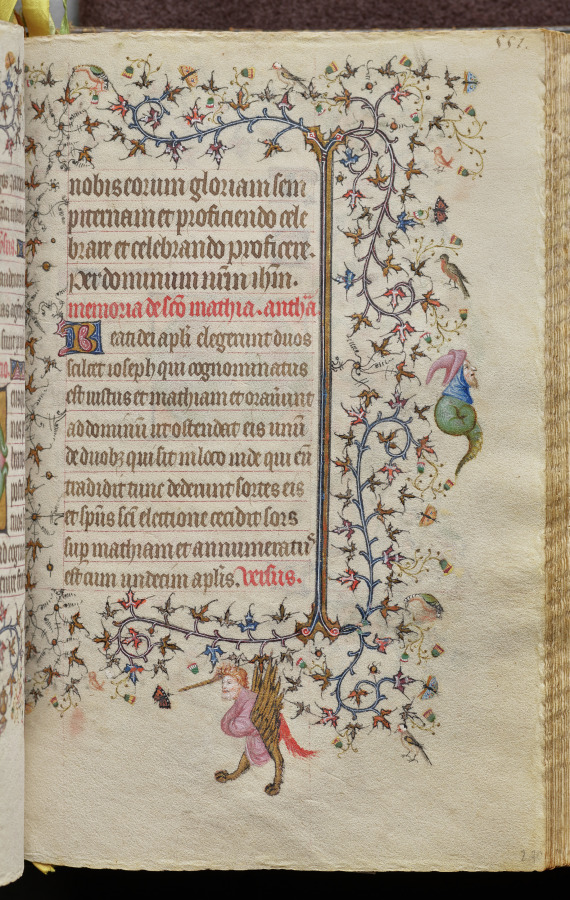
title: Hours of Charles the Noble, King of Navarre (1361-1425): fol. 270r, Text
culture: France, Paris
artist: Master of the Brussels Initials and Associates (French)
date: c. 1405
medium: ink, tempera, and gold on vellum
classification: Bound Volume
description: This precious volume was obviously highly prized by its owner, the French-born King of Navarre, who had his coat of arms painted on no less than twenty folios. Rather than directly commissioning this manuscript from a specific workshop, it seems that Charles the Noble acquired his book of hours -- perhaps ready-made for the luxury market -- while on a trip to Paris in 1404-05. A collaborative effort, six painting styles are evidenced within the pages of this codex, those of two Italians, two Frenchmen, and two Netherlanders. The painter who was responsible for the planning and decoration of the book, and who produced seventeen of the large miniatures, was a Bolognese artist known as the Master of the Brussels Initials. His principal assistant, responsible for most of the borders, was a Florentine who signed his name "Zecho" da Firenze on folio 208 verso.